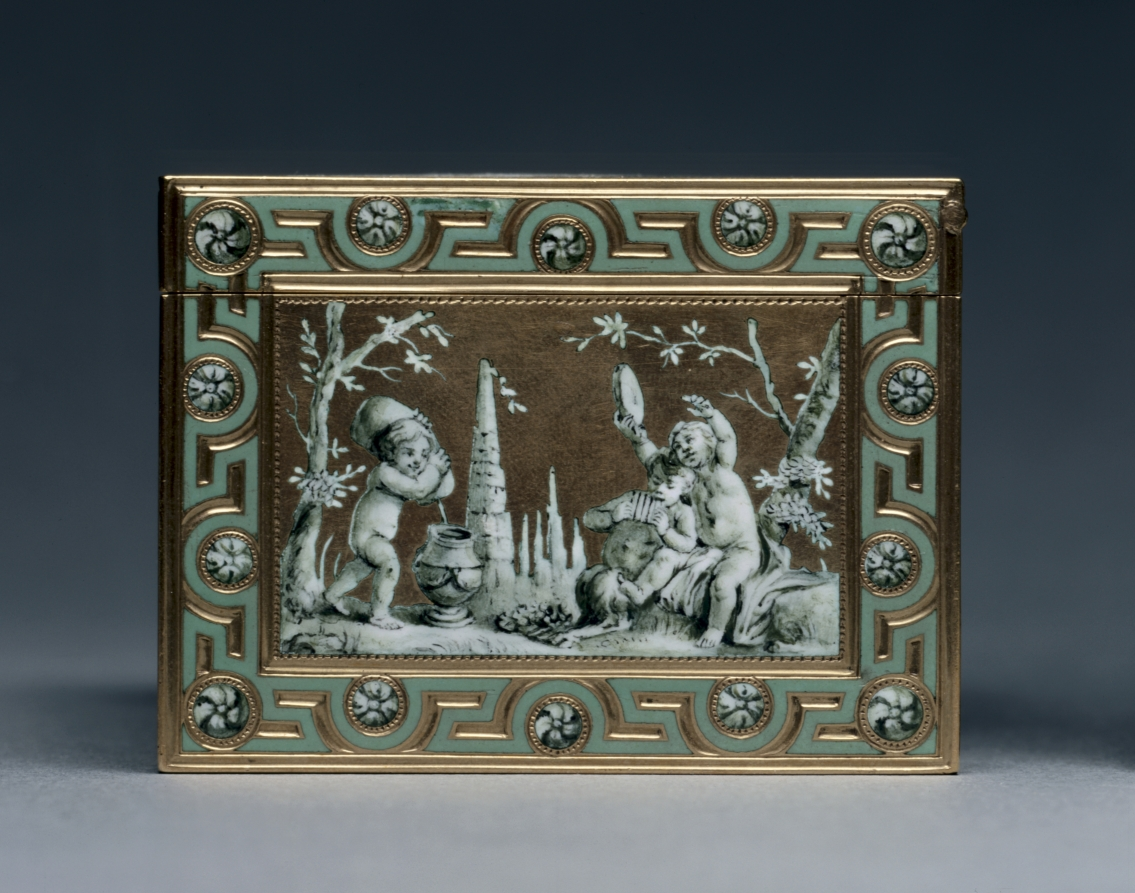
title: Box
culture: France, 18th century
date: c. 1768–1769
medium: gold and enamel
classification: Enamel